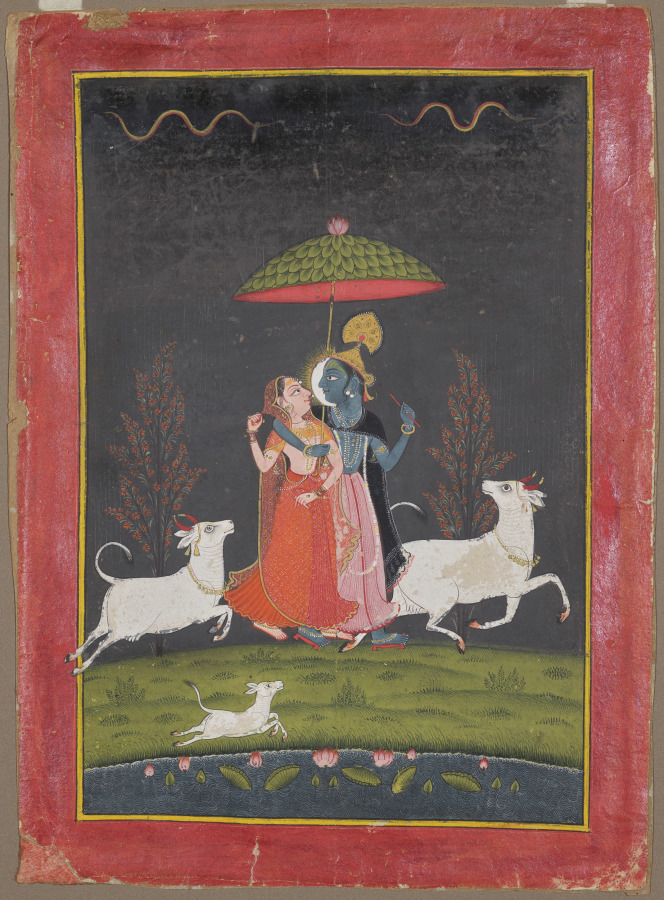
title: Radha and Krishna in the Rain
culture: India, Rajasthan, Bundi school, 18th century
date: c. 1780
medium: Gum tempera, ink, and gold on paper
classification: Painting